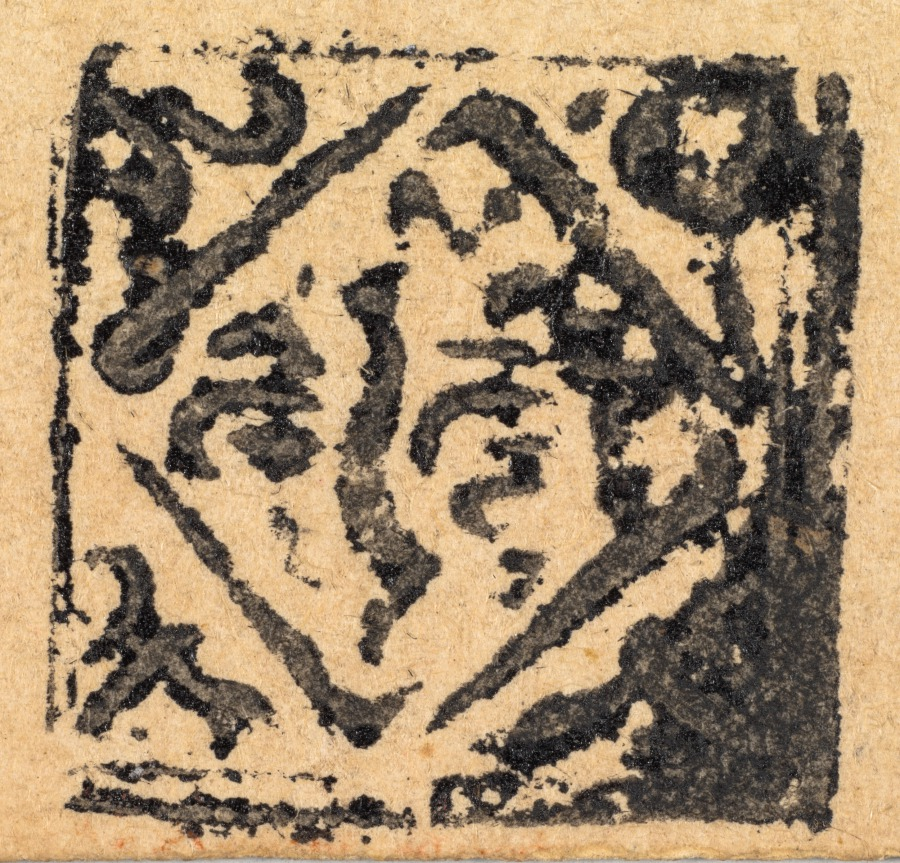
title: Shah Tahmasp I (1514–1576) Seated in a Landscape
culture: Iran, Qazvin, Safavid period (1501-1722)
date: c. 1575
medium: opaque watercolor and gold on paper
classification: Manuscript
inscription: Inscription in English, undated: "Portrait of Tahmasp I, Shāh Safavi, King of Persia (b. 1514: d. 1576). Reigned, 1524–1576. The celebrated ally and friend of the Mogul Emperor Humayun. Persian; about 1575."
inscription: [square black seal]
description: Shah Tahmasp I, the second ruler of Iran’s Safavid dynasty, is shown kneeling pensively on a carpet under a willow on the banks of a stream, a book at his side. The luxurious fabrics of his robe and his bolster pillow, with sprigs and cloud motifs in gold, indicate his wealth and privilege. Even the fine white cloth of his turban is edged in gold, topped by a small cluster of jewels.